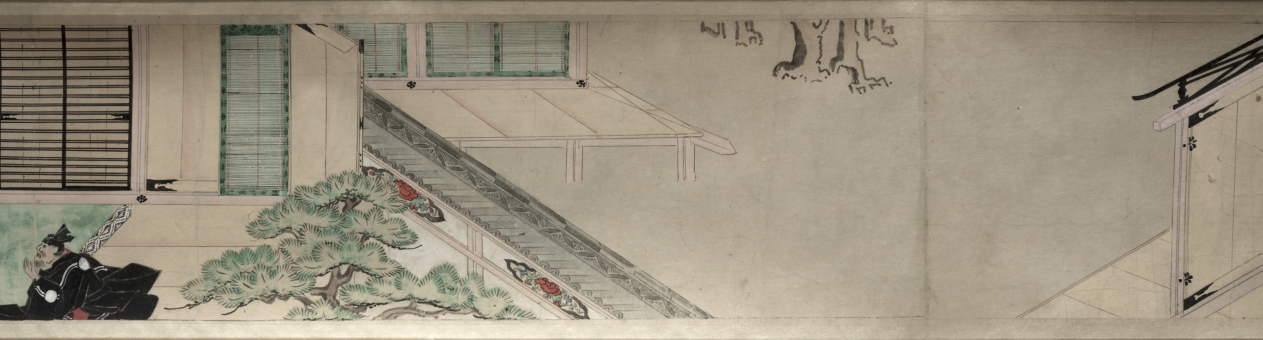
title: The Saltmaker's Story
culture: Japan, Edo period (1615–1868)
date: early 1600s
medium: One of a pair of handscrolls; ink, color, and gold on paper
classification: Painting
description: Once read and copied by girls at New Year’s celebrations and included in dowries, The Saltmaker’s Story is a rags-to-riches tale in which daughters are gifts from the gods. Despite his simple outlook, the main character progresses from humble roots as an associate at Kashima Shrine to the elite status of grandfather of the emperor through the intervention of the Kashima deity. The Saltmaker’s Story is traditionally presented in a set of three scrolls, but the text of this set has been removed by a previous owner, who remounted the illustrations as a pair. The paintings of this one take us from right to left through the second half of the tale.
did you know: This handscroll originally had texts before its paintings, but the texts were removed.